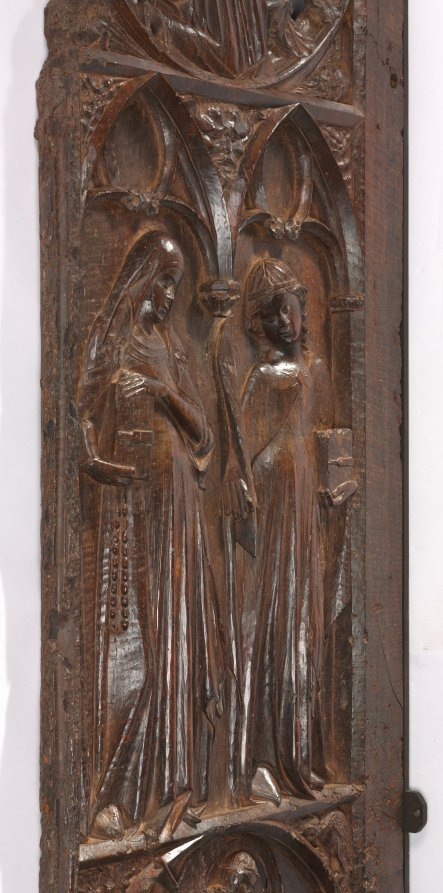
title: Panel from a Choir Stall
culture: Spain, Catalonia, Monastery of Pedralbes, 14th century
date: c. 1330–1340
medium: walnut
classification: Furniture and woodwork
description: The large panel shown here was probably the end panel of a stall that faced another across the choir of a Gothic church. The panel is carved with the figure of St. Francis of Assisi kneeling in prayer and receiving the stigmata. Two standing figures also appear on this panel: a nun at the left (perhaps St. Claire) and a female martyr at the right. Below is St. Michael and the dragon.